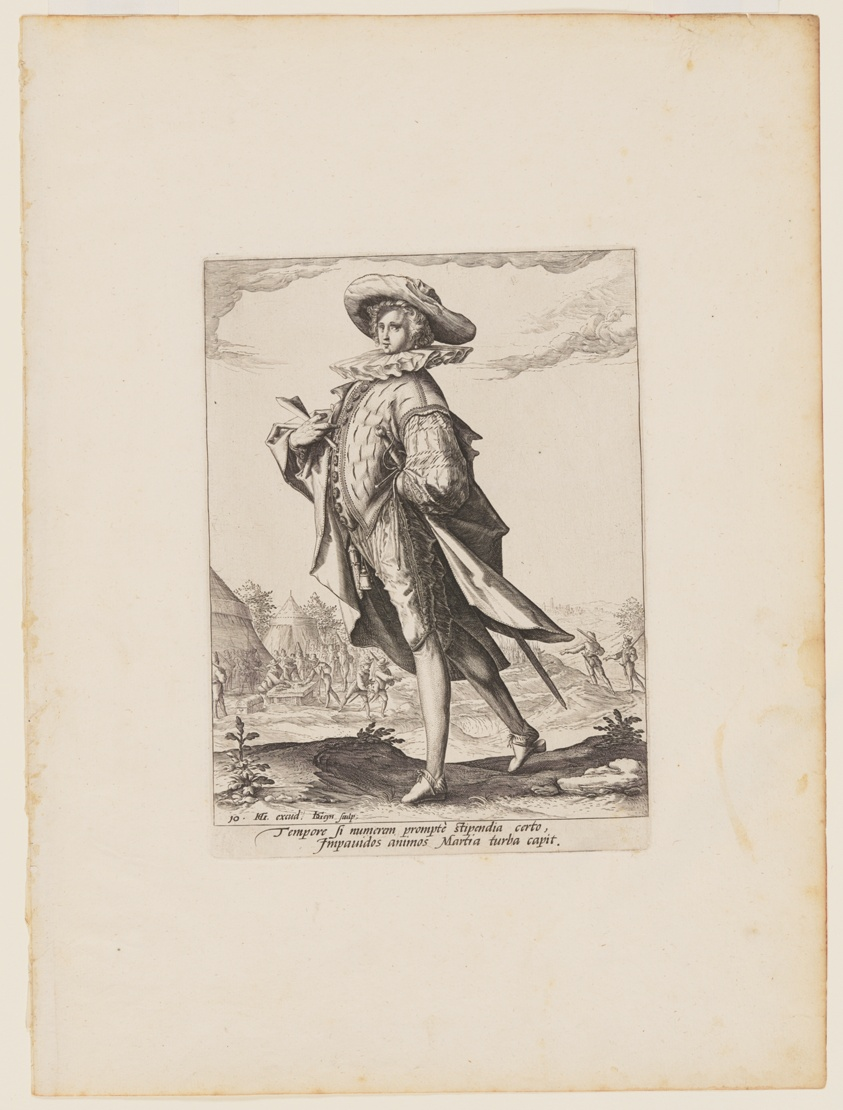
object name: Print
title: Treasurer, from Officers and Soldiers of the Bodyguard of Emperor Rudolph II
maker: Jacques de Gheyn II (Dutch, 1565–1629); after Hendrick Goltzius (Dutch, 1558–1617)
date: 1587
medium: Engraving on ivory laid paper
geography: Netherlands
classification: engraving; paper; print; prints and drawing